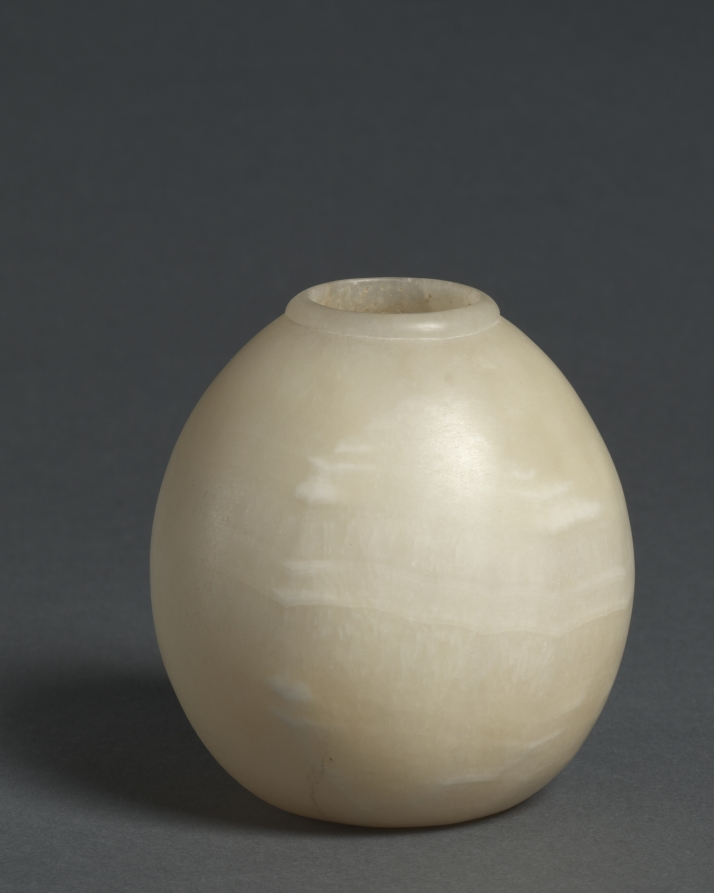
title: Vessel in the Form of an Ostrich Egg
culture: Egypt, New Kingdom (1540–1069 BCE), Dynasty 18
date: c. 1540–1296 BCE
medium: travertine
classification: Vessels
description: Both ancient Egyptian men and women loved cosmetics. Unguents, oils, and perfumes made from aromatic plant resins and gums were obtained at great cost from distant lands. The objects identified with cosmetics were given lavish treatment. Here the fanciful form is an ostrich egg.